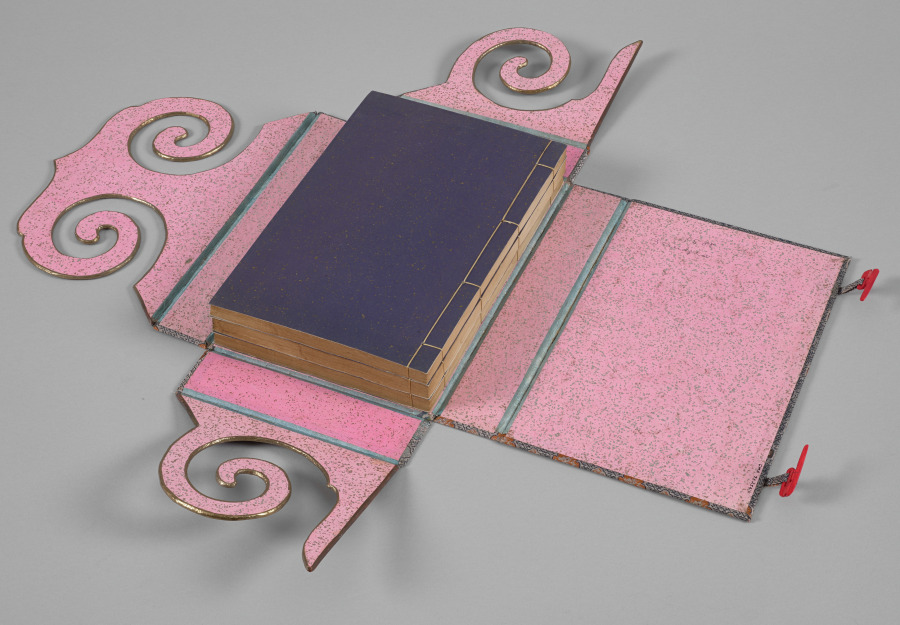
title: Yu-hai (Ocean of Jade) woodblock bound volume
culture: China, Ming dynasty (1368–1644)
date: 1368–1644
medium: woodblock-printed book with painted edges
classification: Bound Volume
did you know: When each book is rolled to form a cylinder, a landscape appears on the edges, painted in ink and washes of color.